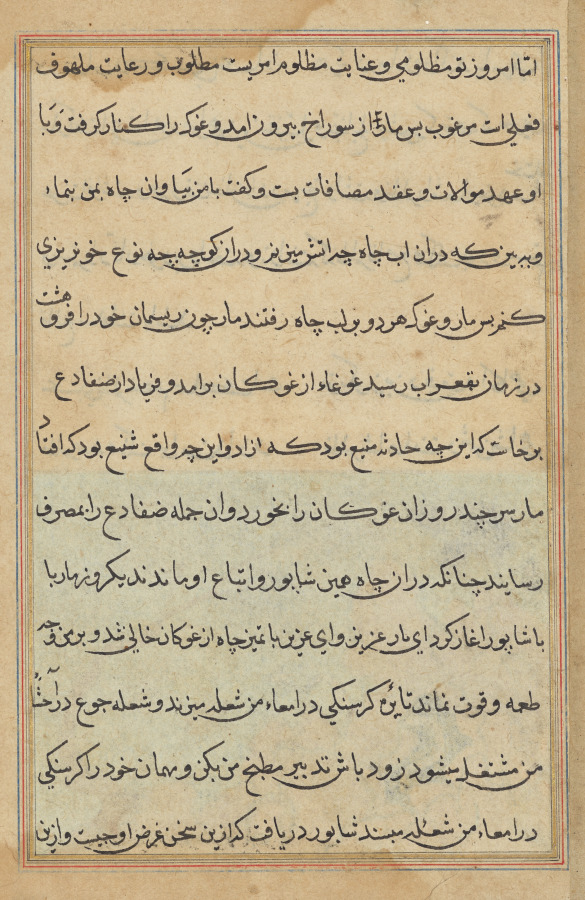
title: Page from Tales of a Parrot (Tuti-nama): text page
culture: Mughal India, court of Akbar (reigned 1556–1605)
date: c. 1560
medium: gum tempera, ink, and gold on paper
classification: Painting